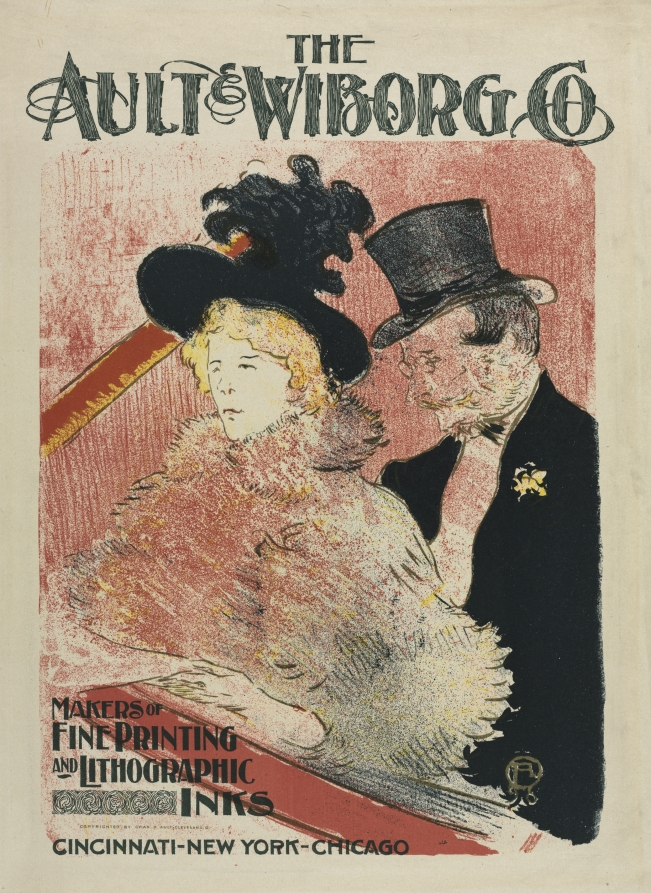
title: Au Concert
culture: France, 19th century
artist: Henri de Toulouse-Lautrec (French, 1864–1901)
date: 1896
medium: lithograph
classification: Print